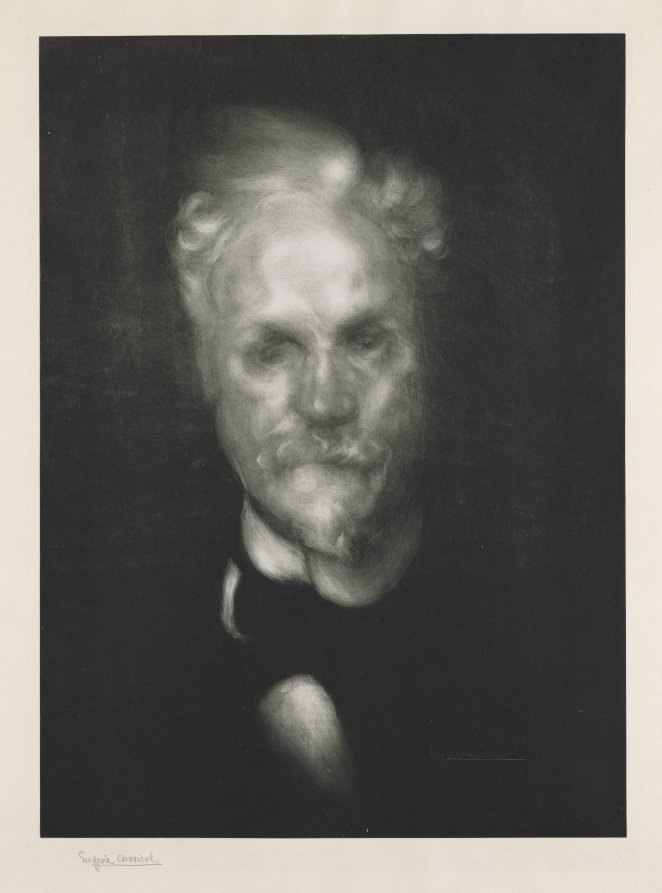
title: Henri Rochefort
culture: France, 19th century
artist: Eugène Carrière (French, 1849–1906)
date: 1896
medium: lithograph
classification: Print